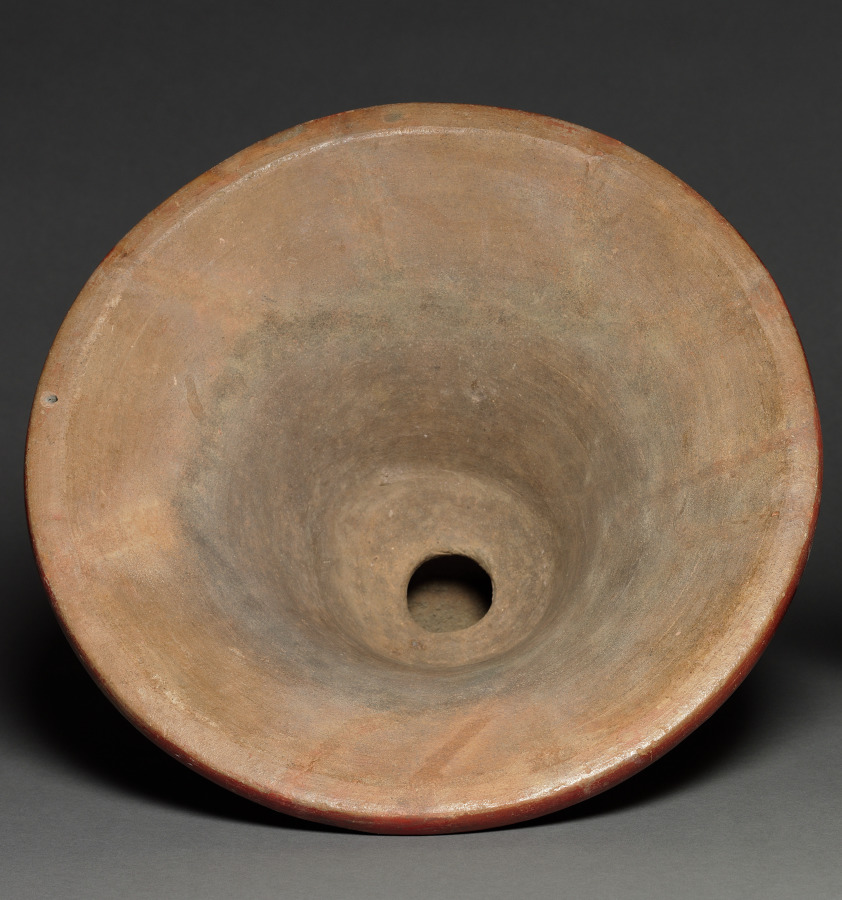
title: Lid of Bowl with Iguana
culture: Costa Rica, Southern Nicoya region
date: c. 600–1100 (Thermoluminescence date, 995–1395)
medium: ceramic, slip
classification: Ceramic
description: At the time of the Spanish conquest in the 16th century, Costa Rican mythology linked iguanas to the sky and to rulers. The earlier makers of this vessel left no written records, but they may have had similar beliefs. The lizard poses as though basking in the sun, a celestial body, and assumes an aggressive stance that could be likened to a ruler's: the teeth and chin under the dewlap are displayed, Also, fine ceramics like this were buried in the graves of the high-status dead, some of them certainly leaders of the several groups that competed in the area.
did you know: Green iguanas can grow to be over 6 feet long.